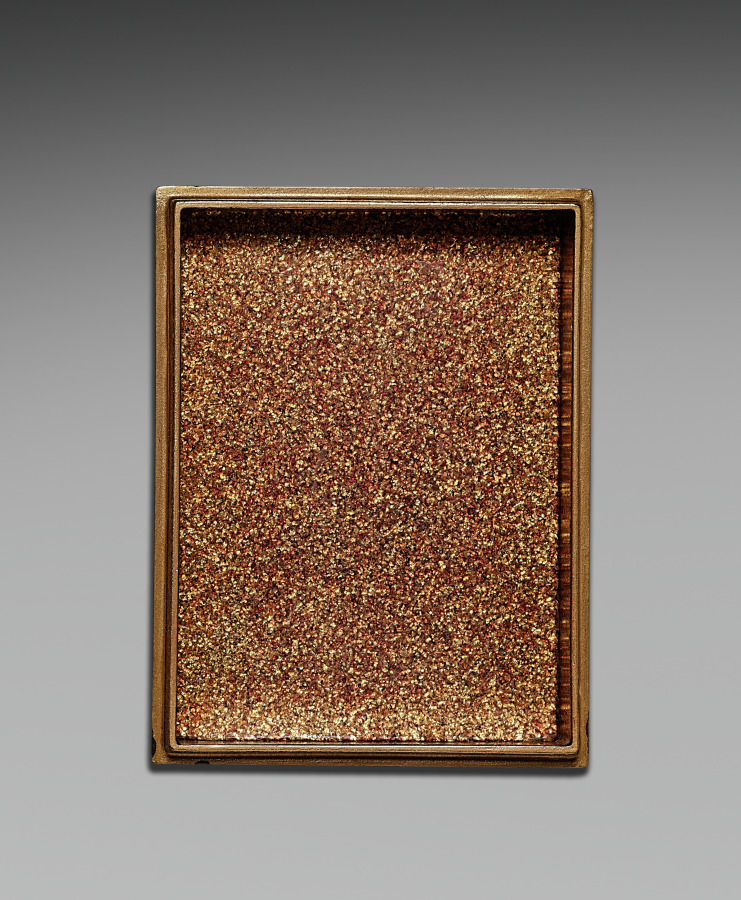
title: Nested Boxes with Chrysanthemums (inner box lid)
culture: Japan, Meiji period (1868–1912)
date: early 1900s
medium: lacquer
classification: Lacquer